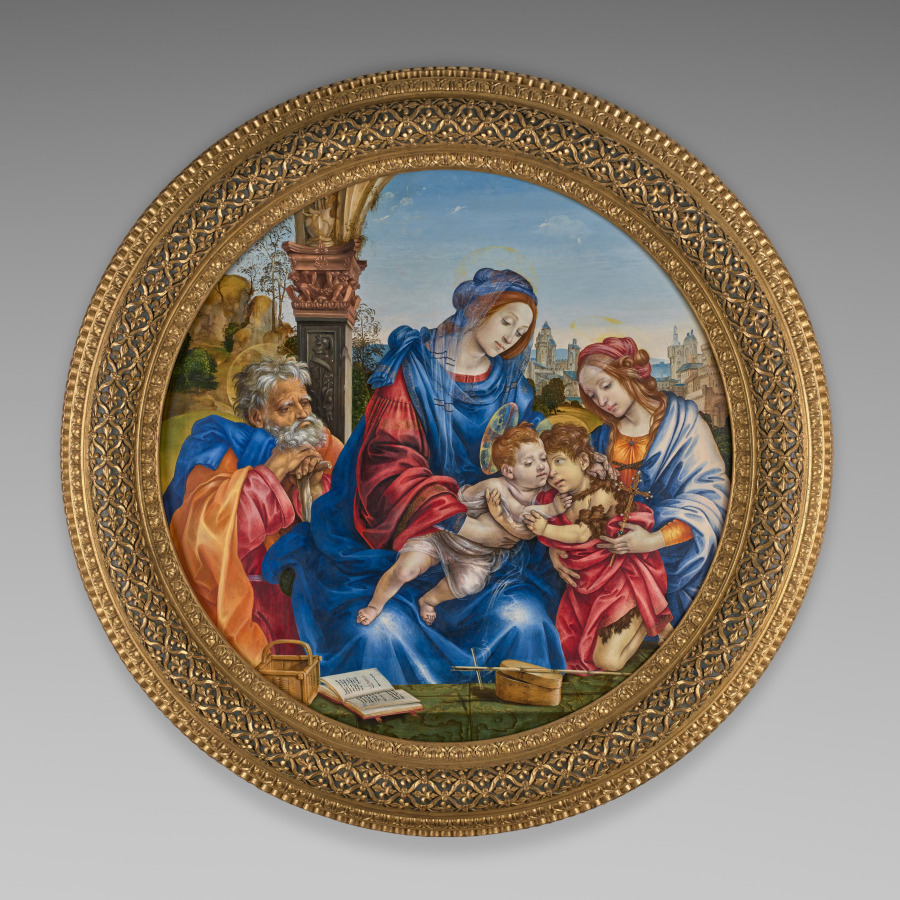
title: The Holy Family with Saint John the Baptist and Saint Margaret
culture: Italy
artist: Filippino Lippi (Italian, c. 1457–1504)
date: c. 1488–93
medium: tempera and oil on wood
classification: Painting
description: This monumental tondo, among Filippino’s most significant works, was commissioned by Neapolitan cardinal Oliviero Carafa, a leading political and ecclesiastical figure. The painter’s ingenious composition harmoniously overlaps five brilliantly colored divine figures within the challenging circular format. Behind a low wall adorned with sacred and domestic objects, Joseph observes the intertwined group of Mary holding Christ, who embraces his cousin John the Baptist, supported by Saint Margaret. Created during Filippino’s Roman years (1488–93), the painting reflects the inspiration he drew from ancient art. The preparatory drawing reveals how he reimagined Greco-Roman figures—his sketch of an antique Venus statue was refashioned into Saint Margaret—while the weathered pier references remnants of ancient architectural and decorative motifs, illustrating Filippino’s deep engagement with the fragments of antique murals, sculpture, and architecture throughout the city.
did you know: Ultramarine, the blue pigment used lavishly across this tondo (circular painting), was many times more expensive than gold in the Renaissance.